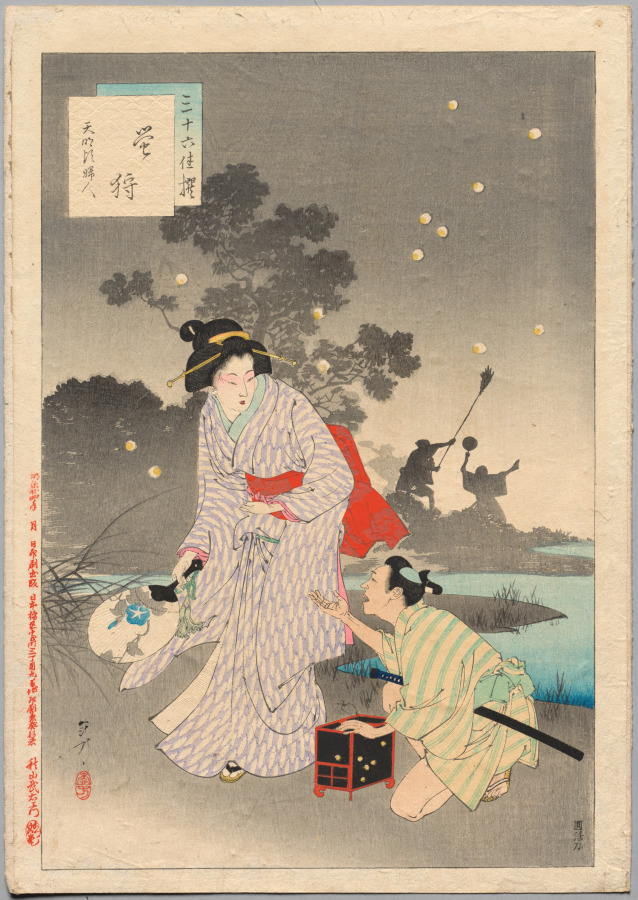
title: Chasing Fireflies, A Lady of the Tenmei Era (1781-1789), from the series Thirty-six Elegant Selections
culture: Japan, Meiji period (1868–1912)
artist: Mizuno Toshikata (Japanese, 1866–1908)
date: 1894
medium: Woodblock print, ink and color on paper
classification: Print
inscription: Inscription Type: series title Inscription Transliteration: 三十六佳撰 Inscription Romanization: Sanjūrokkasen Inscription translation: The Thirty-six Elegant Selections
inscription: Inscription Transliteration: 蛍狩天明頃婦人 Inscription Romanization: Hotaru gari, Tenmei goro fujin Inscription translation: Chasing Fireflies, A Lady of the X Era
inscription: Inscription Type: artist’s signature Inscription Transliteration: 年方 Inscription Romanization: Toshikata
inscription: Inscription Type: artist’s seal Inscription Transliteration: 應斎年方 Inscription Romanization: Ōsai Toshikata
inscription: Inscription Type: engraver’s seal Inscription Transliteration: えん活刀 Inscription Romanization: En-Katsu to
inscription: Inscription type: date and publisher’s information Inscription Translation: Meiji 27 (1894) Akiyama Buemon (summary)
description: Each of the prints in the series Thirty-six Elegant Selections features a woman from a different time period, as befits an artist who was interested in history painting. Most of the prints are set in the Edo period (1615–1868). Mizuno Toshikata was a favored student of Tsukioka Yoshitoshi (1839–1892), and took over his post as a newspaper illustrator.